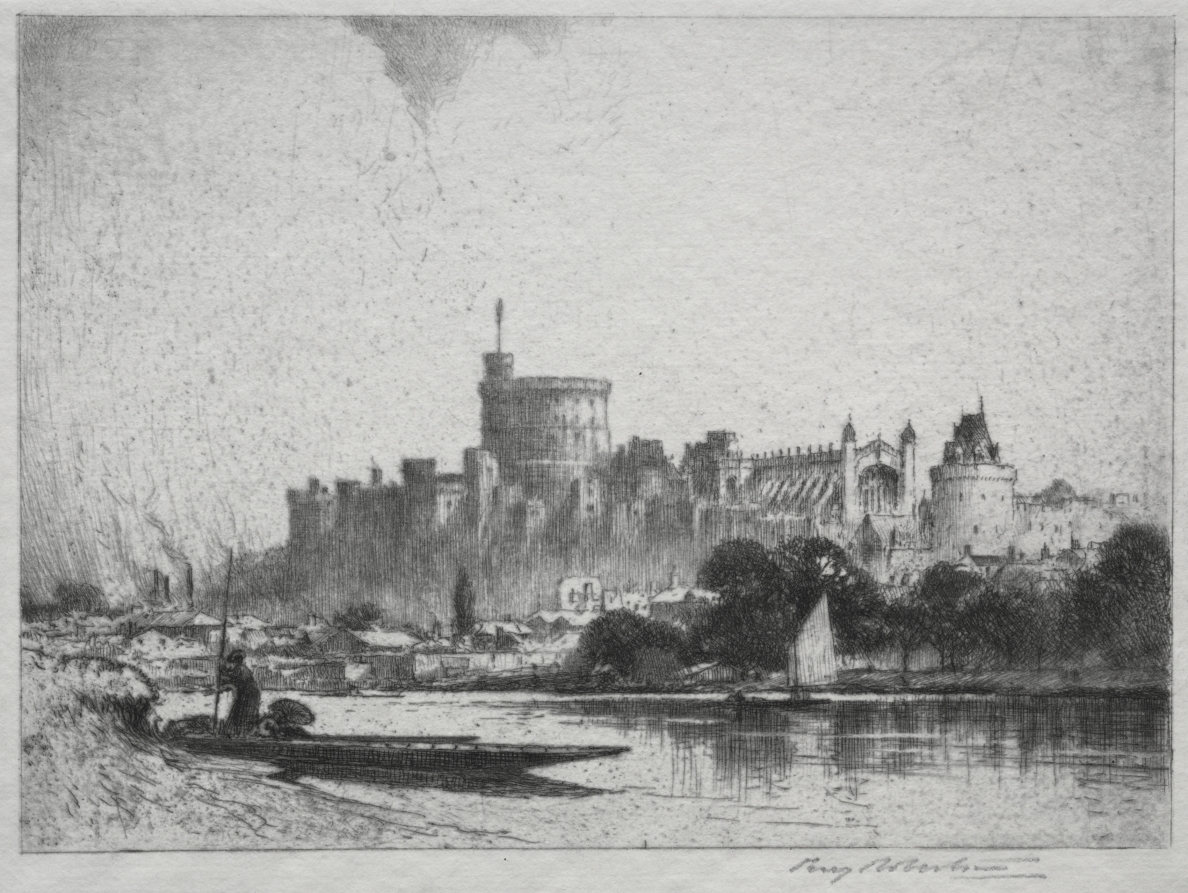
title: Windsor Castle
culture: England, 19th-20th century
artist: Percy Robertson (British, 1868–1934)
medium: etching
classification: Print